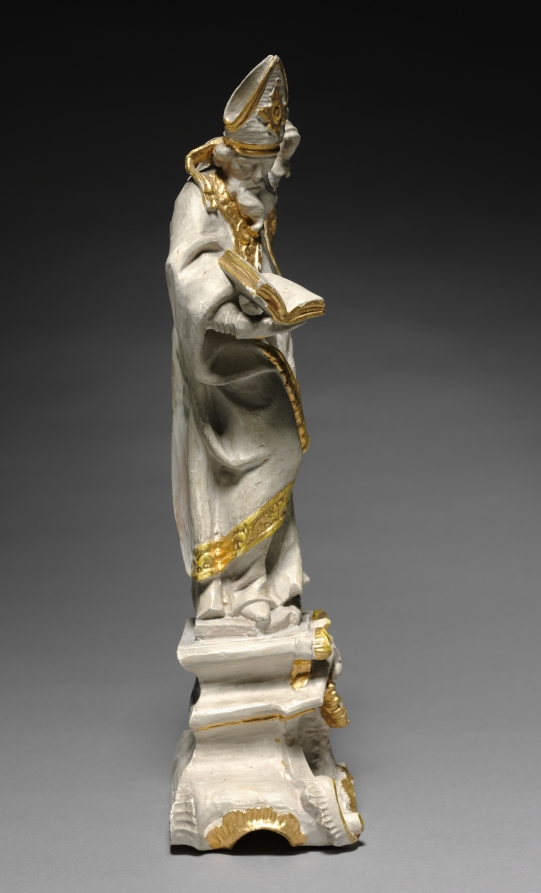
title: Bishop Saint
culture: Germany, 18th century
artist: attributed to Ferdinand Tietz (Austrian, 1708–1777)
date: c. 1740–1750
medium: painted and gilded wood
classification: Sculpture